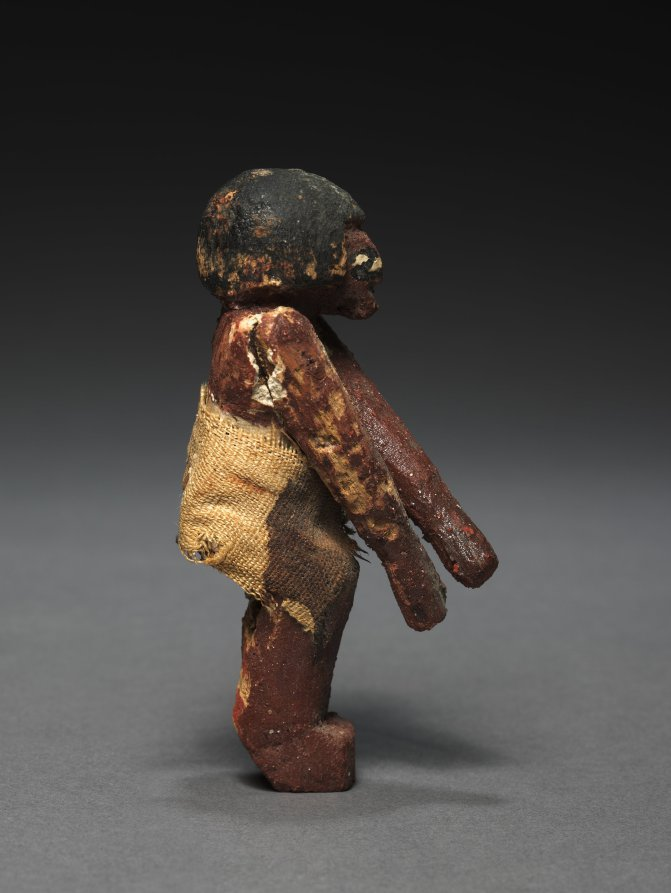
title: Seated Model Sailor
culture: Egypt, Middle Kingdom (2040–1648 BCE), Dynasties 11–12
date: c. 2000–1000 BCE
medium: painted sycamore fig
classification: Funerary Equipment